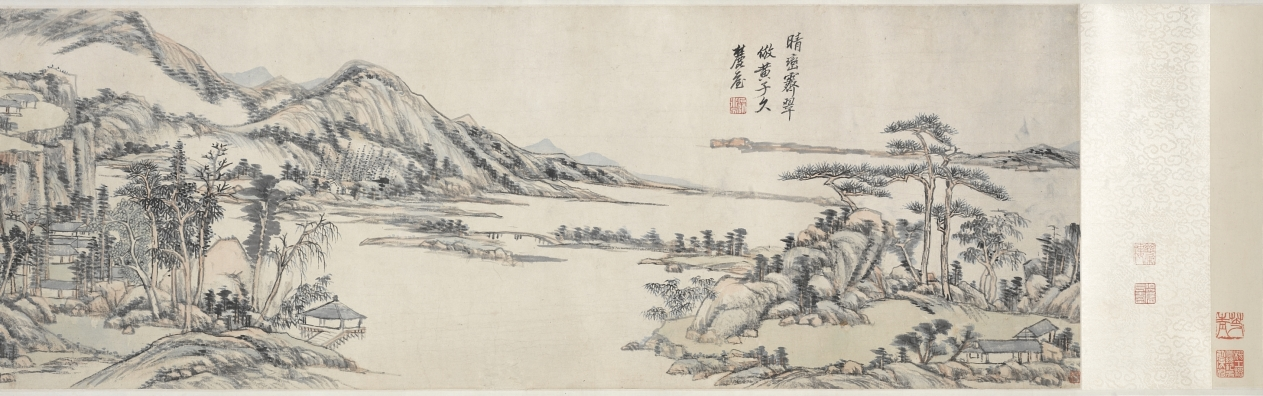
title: Green Peaks under Clear Sky: After Huang Gongwang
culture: China, Qing dynasty (1644-1911)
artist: Wang Yuanqi (Chinese, 1642–1715)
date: 1703–8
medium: handscroll; ink and light color on paper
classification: Painting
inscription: 晴巒霽翠：倣黃子久。麓臺。[印]石師道人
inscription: [印] 御書畫圖留與人看. 子久畫於宋諸大家荊、關、李、范、董、巨，無所不有。運筆不假修飾。皴法由淡入濃，化諸家之迹者也。澹明徐君偶見縮本，臨摹六幅。囑余參以富春大意，成一長卷。余夙夜在公，乘暇偶一點染。至戊子九秋告竣，閱四、五年矣。昔大癡為無用師作富春卷，七年而成，為千古鉅觀。今拙筆癡鈍。亦淹留至此。可為識者噴飯矣。王原祁題。[印]王原祁印; 麓臺 [印, 畫芯左下] 西廬後人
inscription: 3 additional colophons and 15 additional seals: 1 colophon and 9 seals of Yang Shicong 楊士驄 (b. 1870); 1 colophon of Wu Hufan 吳湖帆 (1894–1968); 1 colophon and 1 seal of Wu Mei (20th c.); 5 seals of Cheng Qi 程琦 (1911–1988).